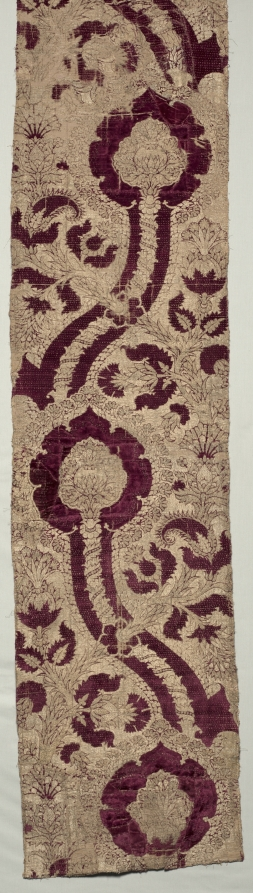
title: Velvet with Pomegranate Pattern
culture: Italy, Florence, 15th century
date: 1450–1500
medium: silk, gold thread; velvet: three heights of cut pile, gold thread loops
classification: Velvet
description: This extravagant Italian velvet with three heights of lush crimson pile is lavishly embellished with gold-thread loops. Large pomegranate patterns such as this were fashionable in Europe for more than a century, about 1420 to 1550, and were often featured in paintings and in large wall tapestries. Variations occurred in pattern details, pile height, and gold thread. Since pomegranates symbolized eternity, fertility, and resurrection, these velvets were often used in Roman Catholic churches. This pomegranate pattern inspired the cope, or cloak, worn by the Archbishop of Canterbury when he officiated the royal wedding of Prince William and Kate Middleton in 2011.